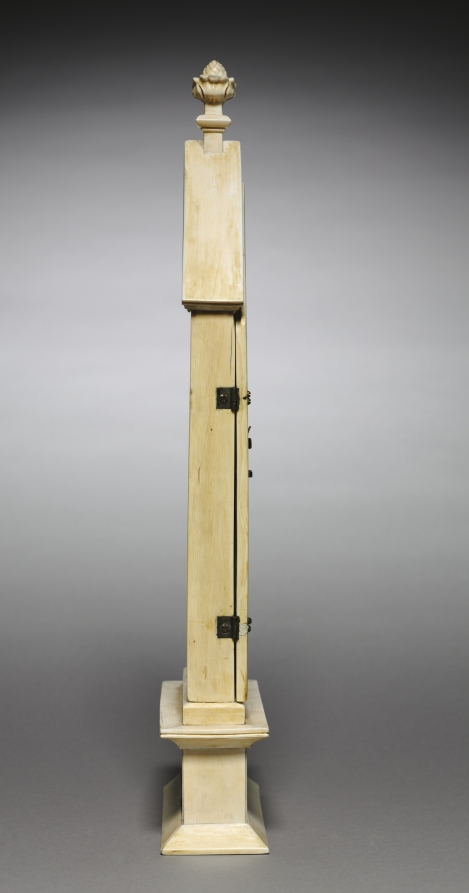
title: Triptych: The Life of the Virgin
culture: France, Lorraine?, or Austria?, Gothic period, 14th century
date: c. 1325–1350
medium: ivory, traces of gilding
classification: Ivory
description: The Virgin and Child, standing beneath a three-part arch, occupy the central plaque of this triptych. On the wings are carved four scenes from the life of the Virgin: the Annunciation, the Visitation, the Adoration of the Magi, and Christ's Presentation in the Temple. By the end of the 12th century, devotional objects like this became widespread in many parts of Western Europe as a result of the growing cult of the Virgin.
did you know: The pinnacle, roof moldings, and base are modern additions attached before the object entered our collection.